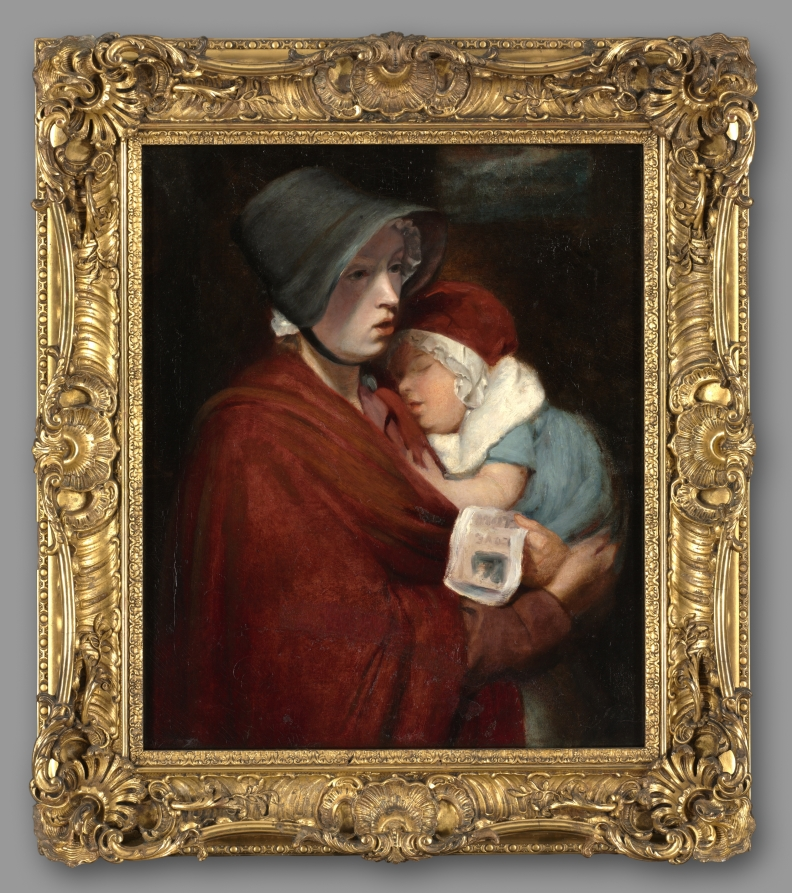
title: Street Singer and Child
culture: England, 18th century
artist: John Opie (British, 1761–1807)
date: 1700s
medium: oil on canvas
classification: Painting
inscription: Inscribed across book: "LOVE/CLOWN (N or R).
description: John Opie's working-class roots made him sympathetic to the plight of the laborer. This painting demonstrates his interest in an honest portrayal of British street life, a sympathy rarely seen in the work of other British artists of his generation, who often presented lower classes more coldly. Much of Britain's population at this time was poor, but beggars and street vendors had a particularly low status. Street singers were often sellers of goods. By focusing the composition tightly on the woman and not including any wares, Opie makes the viewer recognize her humanity; moreover, he emphasizes the connection between mother and child. The singer is working to feed her baby, evoking sympathy from the viewer.